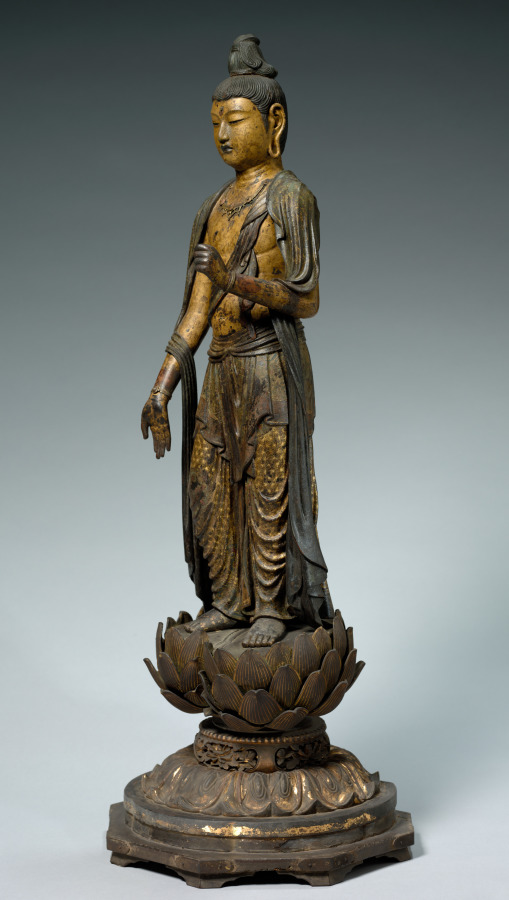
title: Bodhisattva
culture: Japan, Kamakura period (1185–1333)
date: c. 1200–1250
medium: lacquered wood with color, gilt copper, and cut-gold (kirikane)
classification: Sculpture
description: This sculpture represents one of two bodhisattvas who flank the Buddha Amida, the Buddha of Infinite Life and Light. He has one foot in front of the other and his right leg bent at the knee to show that he is in motion; his torso also sways. He accompanies Amida as he descends to collect a dying person who has asked to be born after death into Amida’s Pure Land, a place conducive to progressing along the path to enlightenment.